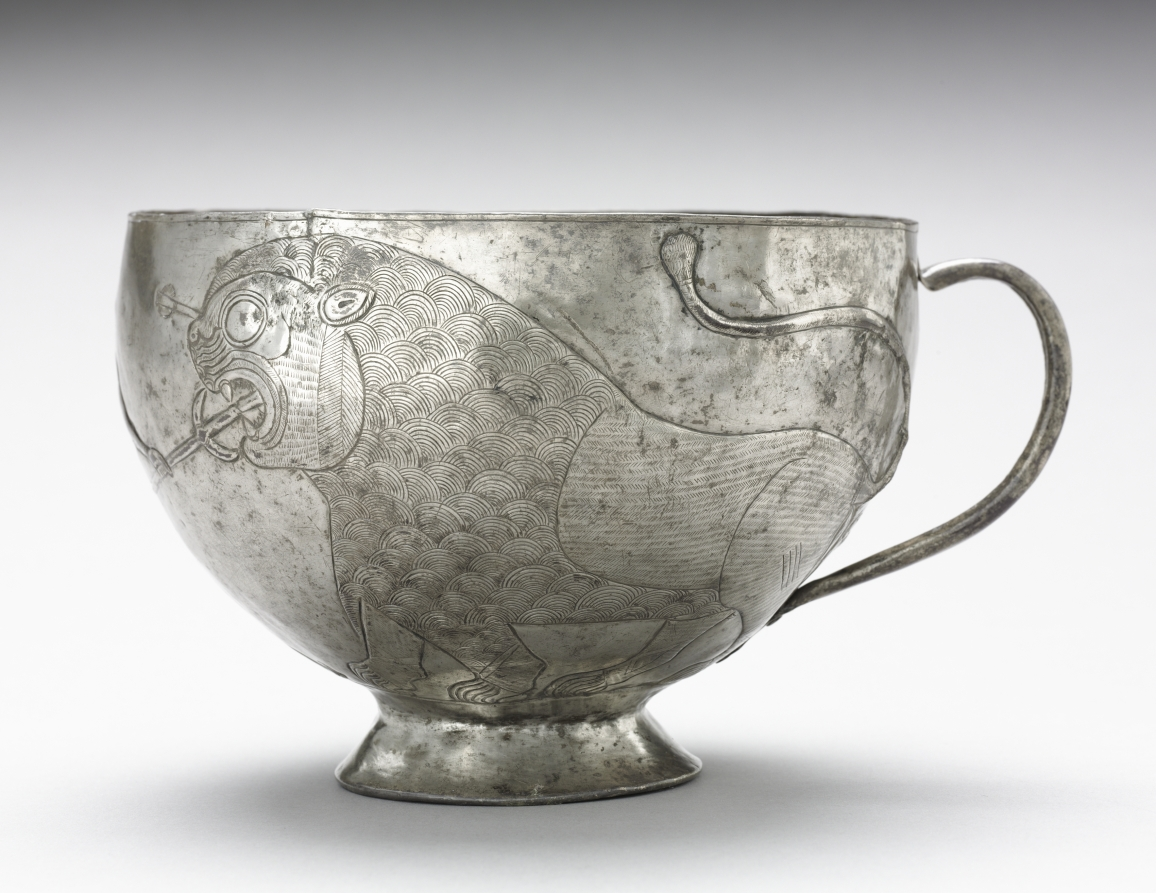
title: Lion Hunting Cup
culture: Iran, Amlash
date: 1100–1000 BCE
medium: silver, raised, chased, repoussé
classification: Metalwork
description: The nomadic gold- and silversmiths of Marlik and Amlash were the first masters of precious metalwork in Iran. Their successors were the bronze workers of Luristan and the silversmiths of the Achaemenian and Sasanian empires.